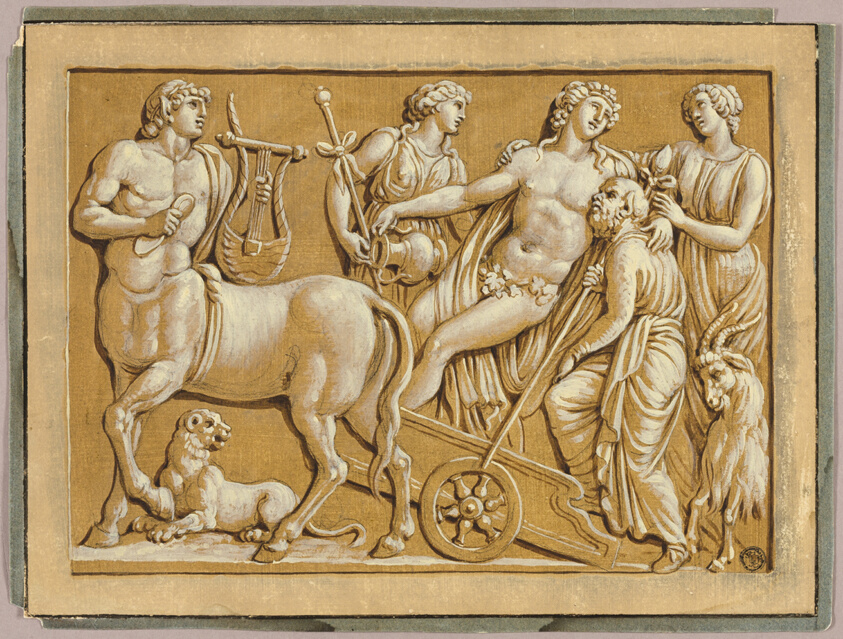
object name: Drawing and Watercolor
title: Bacchus in His Chariot with Attendants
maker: Unknown artist (18th century)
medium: White gouache and brown watercolor, over tan and buff gouache, with black chalk, on cream laid paper, laid down on ivory laid paper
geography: Italy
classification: watercolor; gouache; paper; drawings (visual works); prints and drawing